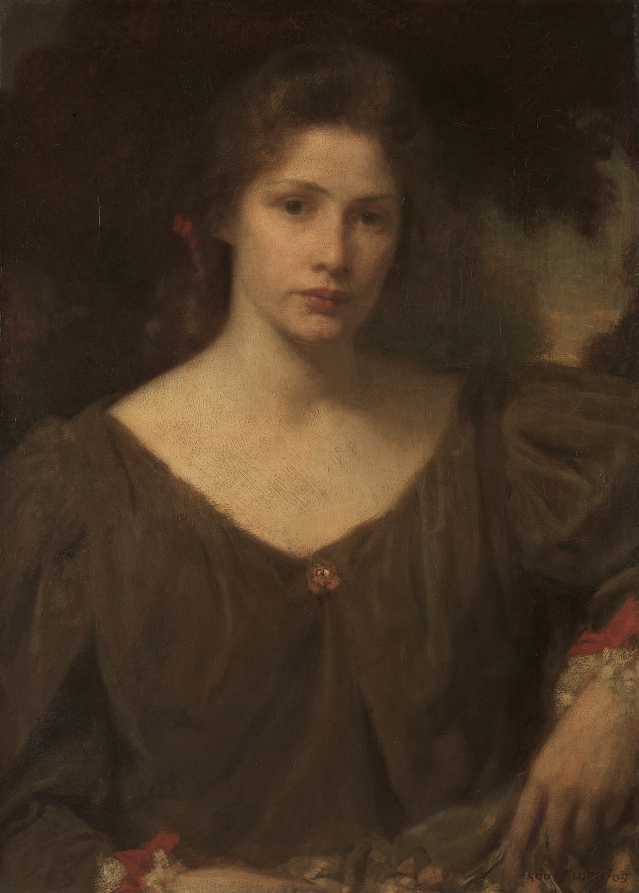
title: Jessica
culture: America, Ohio, Cleveland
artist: Louis Loeb (American, 1866–1909)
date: 1905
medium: oil on canvas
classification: Painting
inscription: signed lower right: Louis Loeb 1905